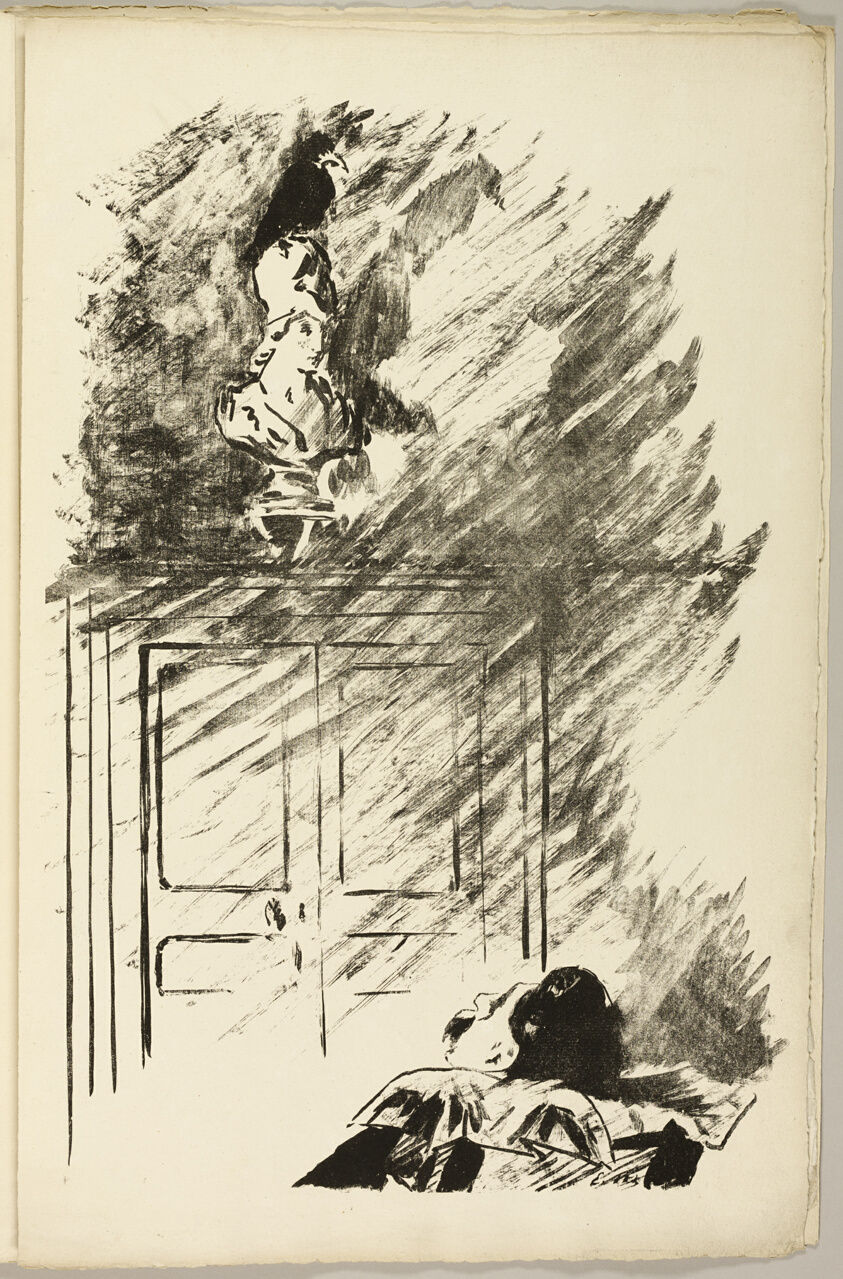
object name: Print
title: The Raven on the Bust of Pallas ("Perched upon a bust of Pallas..."), from The Raven (Le Corbeau)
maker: Édouard Manet (French, 1832-1883); written by Edgar Allan Poe (American, 1809-1849); translated and produced by Stéphane Mallarmé (French, 1842-1898); printed by Lefman et Cie. (French, 19th century); published by Richard Lesclide (French, 1825-1892)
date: 1875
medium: Transfer lithograph in black on cream laid paper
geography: France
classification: lithograph; paper; print; prints and drawing